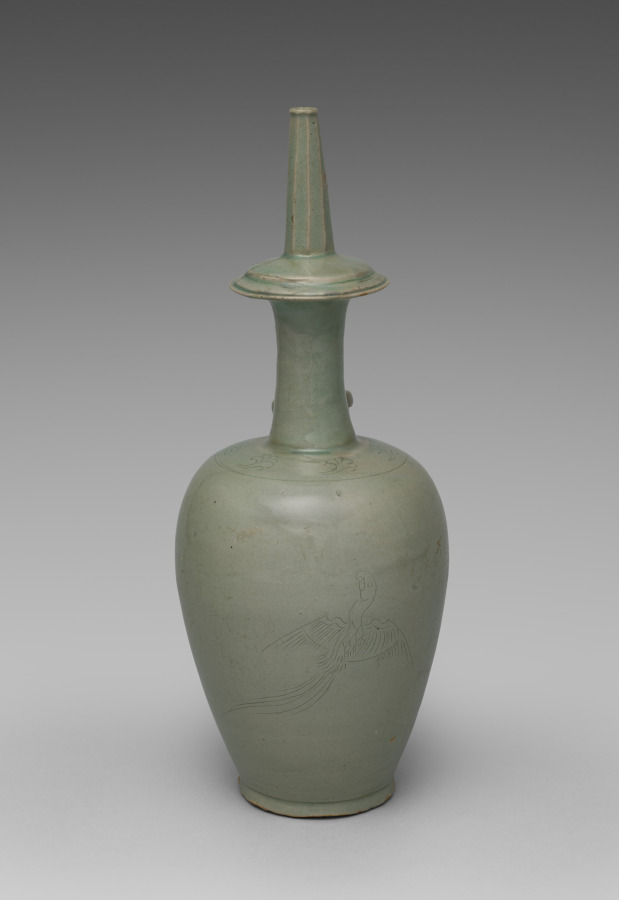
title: Water Ewer for Rituals (Kundika) with Incised Parrot Design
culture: Korea, Goryeo dynasty (918–1392)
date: 1100s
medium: stoneware with celadon glaze, incised and carved decoration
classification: Ceramic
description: This distinctively shaped celadon vessel is a kundika. With a spout on one side, this type of vessel is often used in Buddhist purification rituals. Unlike most existing examples that have an image of a willow tree, this work has a rare flying phoenix design incised on its surface. During the Goryeo period (918-1392), about 260 kilns operated in mainly Jeolla and Chungcheong provinces, meeting a soaring demand for high-end products like this example.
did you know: Unlike most existing examples that have an image of a willow tree or lotus pond, this ewer bears an image of flying parrots delicately incised on its surface.